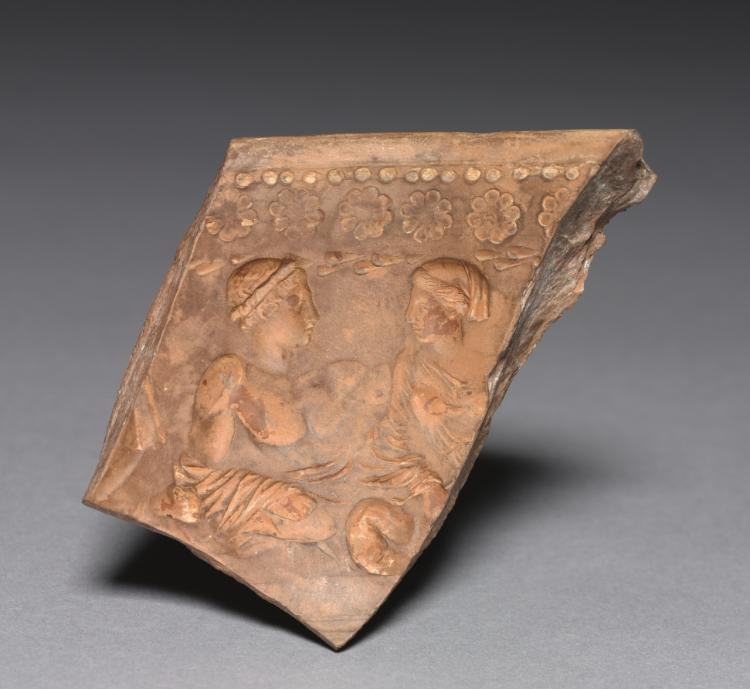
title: Fragment of a Mold for Arretine Bowl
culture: Italy, Roman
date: 27 BCE–14 CE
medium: terracotta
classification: Ceramic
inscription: Signed M. Perenn Tigiani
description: Showing a young man and woman reclining, probably at a symposium, this fragment comes from a mold that would have been used to produce relief-decorated terracotta bowls. For less affluent consumers, such products may have served as affordable alternatives to costlier versions made with precious metal.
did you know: Arretine ware takes its name from Arretium (modern Arezzo, Italy), a major production site.